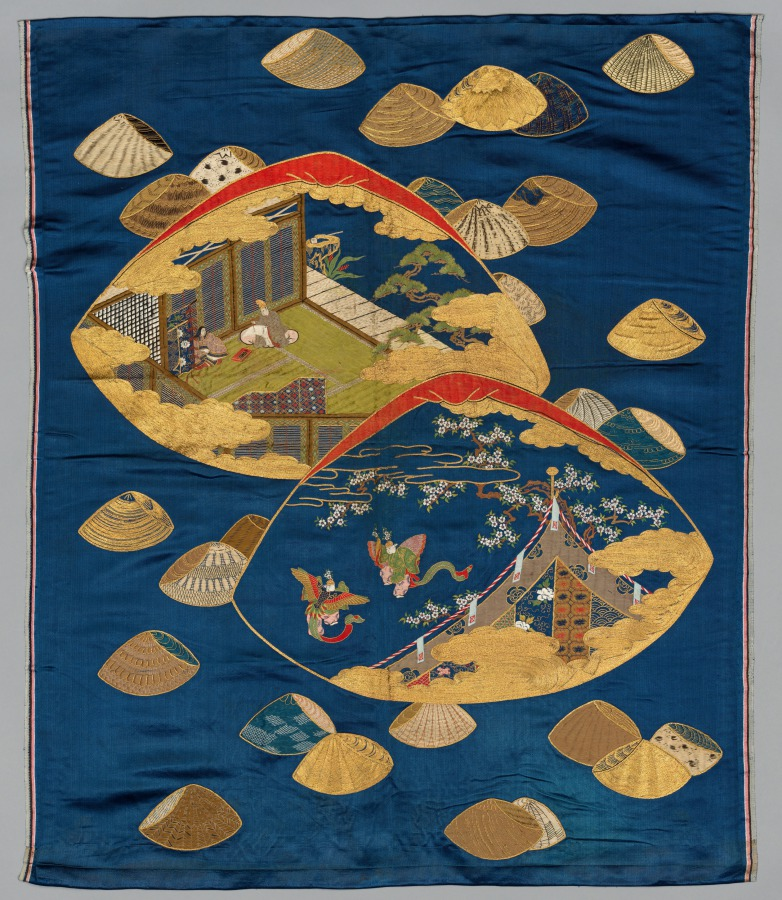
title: Gift Cover (Fukusa) with Tale of Genji Shell-Matching Game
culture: Japan, Meiji period (1868–1912)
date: 1868–1912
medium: Silk: embroidered; metallic thread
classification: Embroidery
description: Japanese elites once presented gifts in boxes with gift covers (fukusa) draped over them. The decorated covers were typically lined with a monochrome backing, but this one’s borders are exposed. Its design is a Tale of Genji shell-matching game. Two clamshells shown in close-up are painted with scenes from two chapters of the novel. The one on the bottom is an episode from the “Kochō” (Butterflies) chapter, in which Genji’s beloved Murasaki sends her young attendants to dance for the empress. The one on the top may depict Genji writing a poem in the “Suzumushi” (Bell Cricket) chapter.